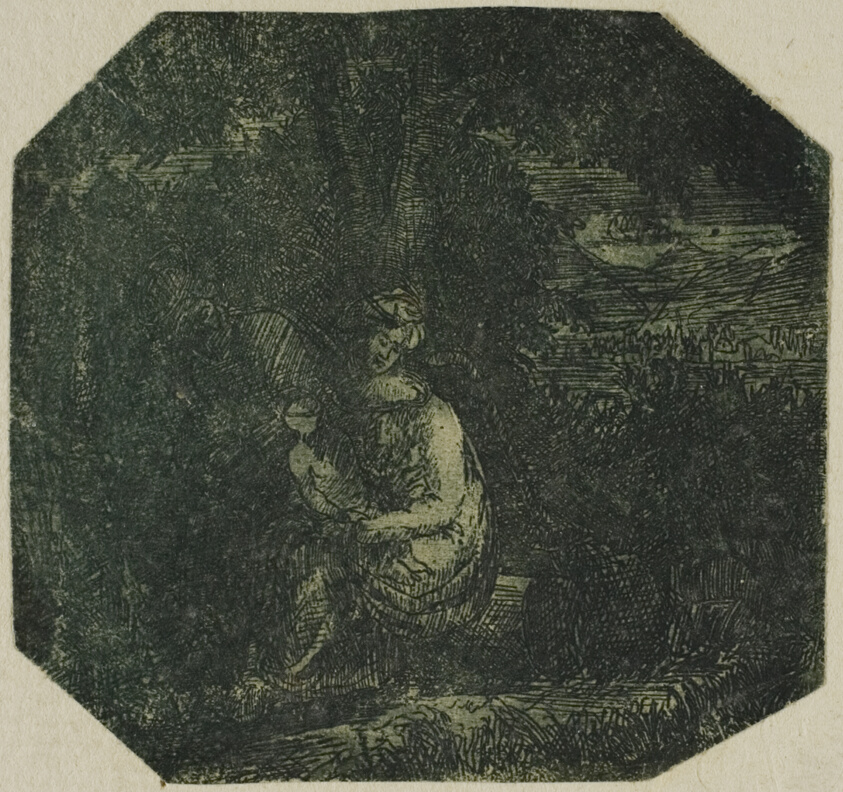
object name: Print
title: The Holy Family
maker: Rodolphe Bresdin (French, 1825-1885)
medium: Etching in dark blue on ivory laid paper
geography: France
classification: etching; print; prints and drawing